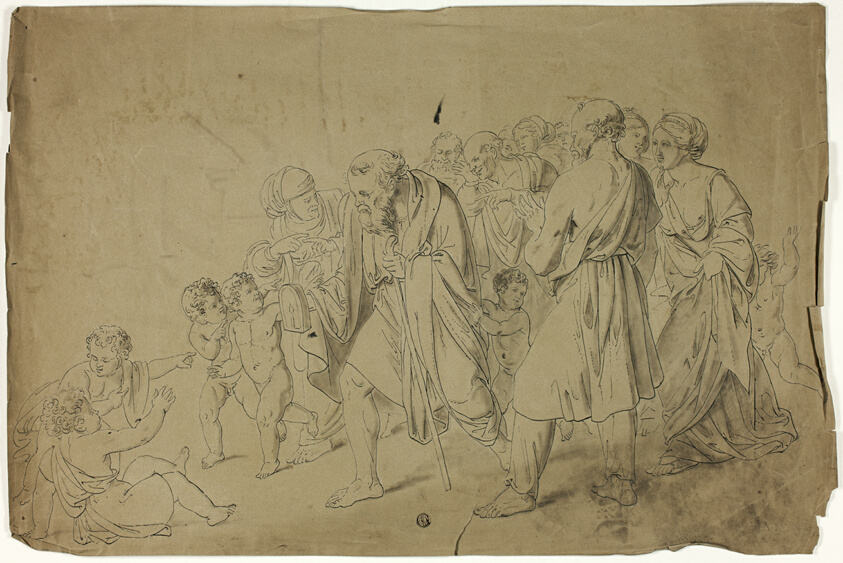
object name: Drawing and Watercolor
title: Diogenes Searching for an Honest Man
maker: Unknown Artist; Euopean, 19th century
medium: Pen and black ink and brush and gray wash on grayish-tan wove paper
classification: pen and ink drawings; paper; brush and wash; drawings (visual works); prints and drawing